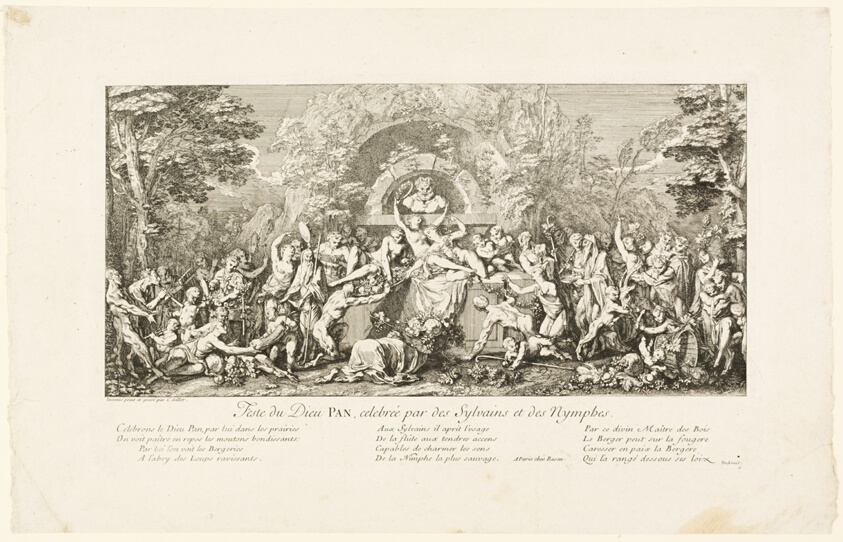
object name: Print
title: Festival of the God Pan, Celebrated by the Sylvans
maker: Claude Gillot (French, 1673-1722)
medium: Etching on paper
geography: France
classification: etching; print; prints and drawing